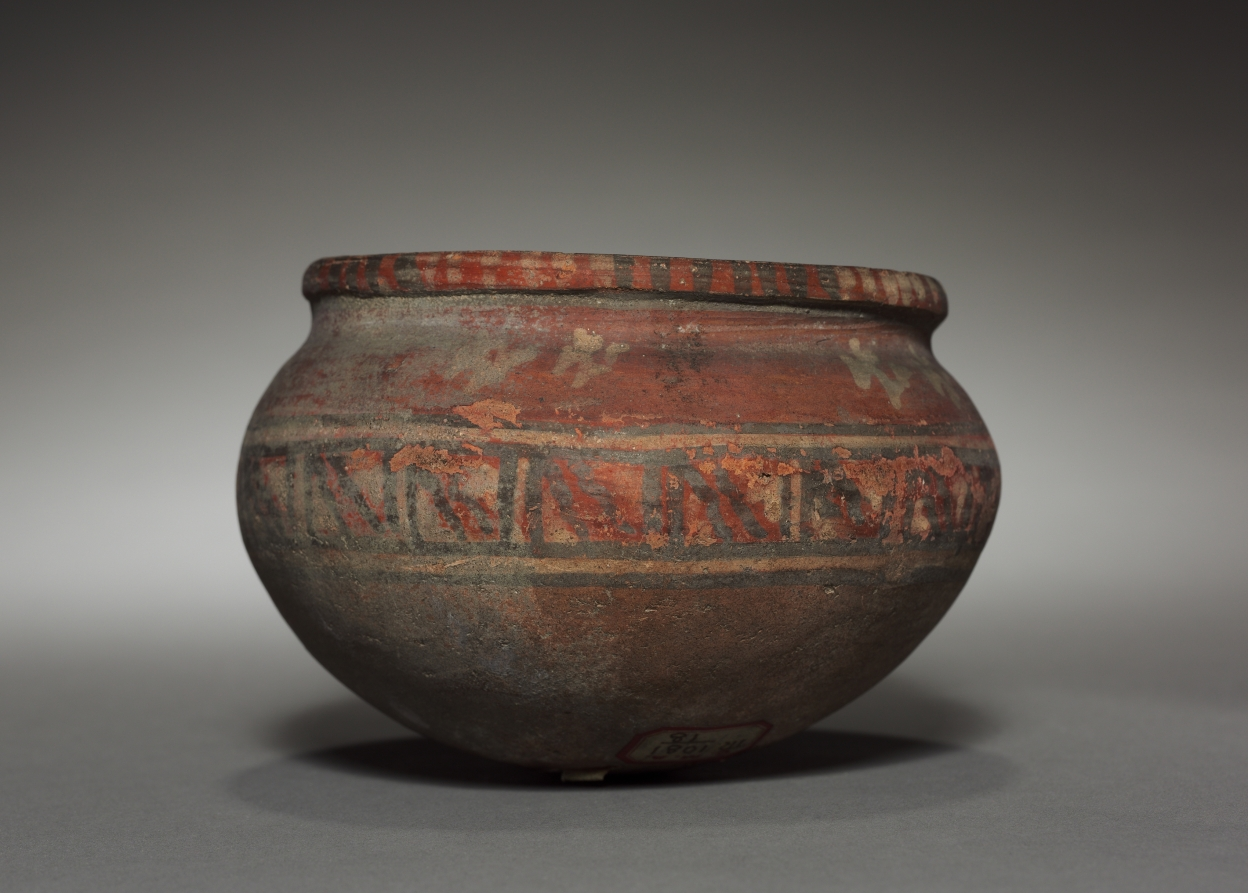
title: Bowl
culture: Peru, South Coast, 10th-11th century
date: 900–1100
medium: pottery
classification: Ceramic